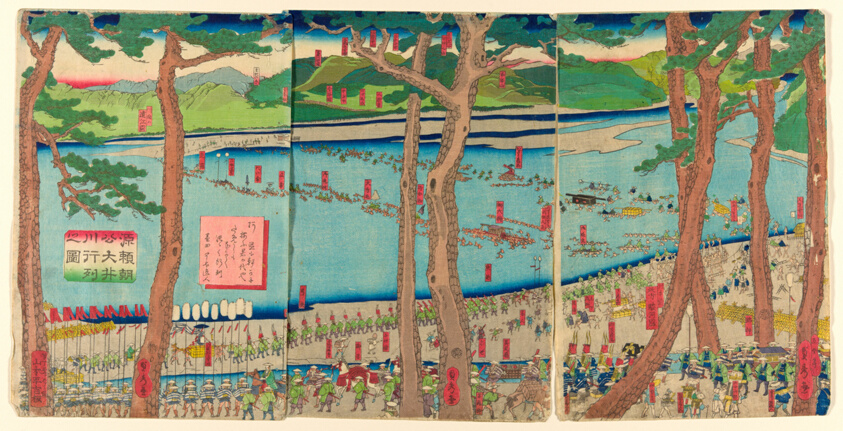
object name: Print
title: Procession of Minamoto no Yoritomo across the Oi River (Minamoto Yoritomo ko Oikawa gyoretsu zu)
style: Japanese (culture or style)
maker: Utagawa Sadahide (Japanese, 1807-1873)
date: 1863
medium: Color woodblock print; oban triptych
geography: Japan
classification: woodblock print; print; asian art